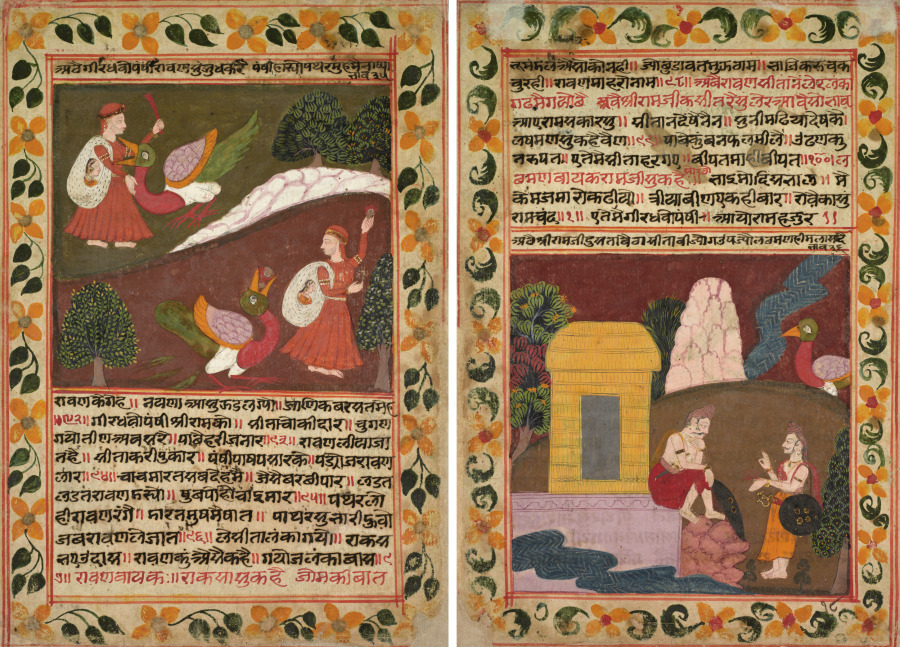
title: Folio 18 from a Chandana Malayagiri Varta (Story of King Chandana and Queen Malayagiri) of Karamachand: Ravana battles the great vulture Jatayu and defeats him by throwing stones in his mouth (recto); Jatayu approaches Rama and Lakshmana who are wondering where Sita could be (verso)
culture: Northwestern India, Rajasthan, Rajput Kingdom of Kishangarh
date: 1744–45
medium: Gum tempera, ink, and gold on paper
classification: Painting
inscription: [[recto, caption above image]] aṭhai gīradhavo paṁkhī rāvaṇa suṁ judha karai paṁkhī hāryo pathara muha mai nākhyā / bhāva 35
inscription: [[recto, text below image]] rāvaṇa kai geha || nayaṇā āsu jhaḍa lagyau || jāṇika barasata meha / ||92|| gīradhavo paṁkhī śrī rāma ko || sītā cokīdāra || cugaṇa / gayo tīṇa avasarai || pāchai harī ja nāra ||93|| rāvaṇa līyā jā / ta hai || sītā karī pukāra || paṁkhī pākha pasāra ke || paḍyo ja rāvaṇa / lāra ||94|| cāca mārata saba deha mai || jaisai barachī pāra || laḍata / laḍata rāvaṇa ḍaryo || khuba pohocāï māra ||95|| pathara lo / hī rāvaṇa raṁgai || ḍārata mukha mai khāta || pāthara su bhārī huvo / jaba rāvaṇa le jāta ||96|| le sītā laṁkā gaye || rākasa / bhae ūdāsa || rāvaṇa kuṁ aisai kahai || gayo ja laṁkā bāsa ||9 / 7|| rāvaṇa vāyakaḥ || rākasā su kahai joma kī bāta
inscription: [[verso, caption above image]] aṭhai śrī rāmajī dusatā baiṭhā sītā bījyoga ūpajyau lachamaṇa hī malāsa dai / bhāva 36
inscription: [[verso, text above image and caption]] bhūmaṁḍala aiso ko nahī || jyo chuḍāvata mujha ṭhāma || bhāji karu caka / cura hī || rāvaṇa māharo nāma ||98|| abai rāvaṇa sītā ne lera laṁka / gaḍha mai gayo chai avai śrī rāmajī ka sīta rai suṁ lera āvai so bhāva / āe rāma sakāra su || sītā na deṁkhai naina || sunī maḍhiyā dekha kai | / lakhamaṇa su kahai vaiṇa ||99|| pābe kuṁ banaphala mīlaiṁ || ūḍhaṇa ku / tarupata || ete mai sītā hara gae || bīpata māhībīpata ||100| la / chamaṇa bāyaka rāmajī su kahaiḥ || soraṭho bhāi mo disa bhāla || mai / kema ja māro kaḍhiyo || trīyā bīṇa eka hī bāra || rovai kāsuṁ / rāmacaṁda ||1|| ete mai gīradhavo paṁkhī || āyo rāma hajura ||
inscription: [[verso, lower right corner]] 18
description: Scenes pertaining to the loss and rescue of Sita have been embedded in a popular tale written by Bhadrasena (active c. 1620), and expanded by the poet Karamacand in 1629–30. The pages from this manuscript are dispersed among many collections. Its last page, known from a photograph provided by Arun Bharany in New Delhi, includes a colophon statement. It informs us that the manuscript was written in Samvat 1802 (equivalent to 1744–45) in Kishangarh for five patrons named Rikhaji, Karamchandji, Mahataji, Shri Jagamalaji, and his son Motichandji. The scribe was a monk named Udayasagar in the Bijai (or Vijay) Gacch, a monastic lineage of the Shvetambar Jains.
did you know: Reciting, hearing, and meditating on this story was thought to bring merit for ten million eons (a crore of kalpas).